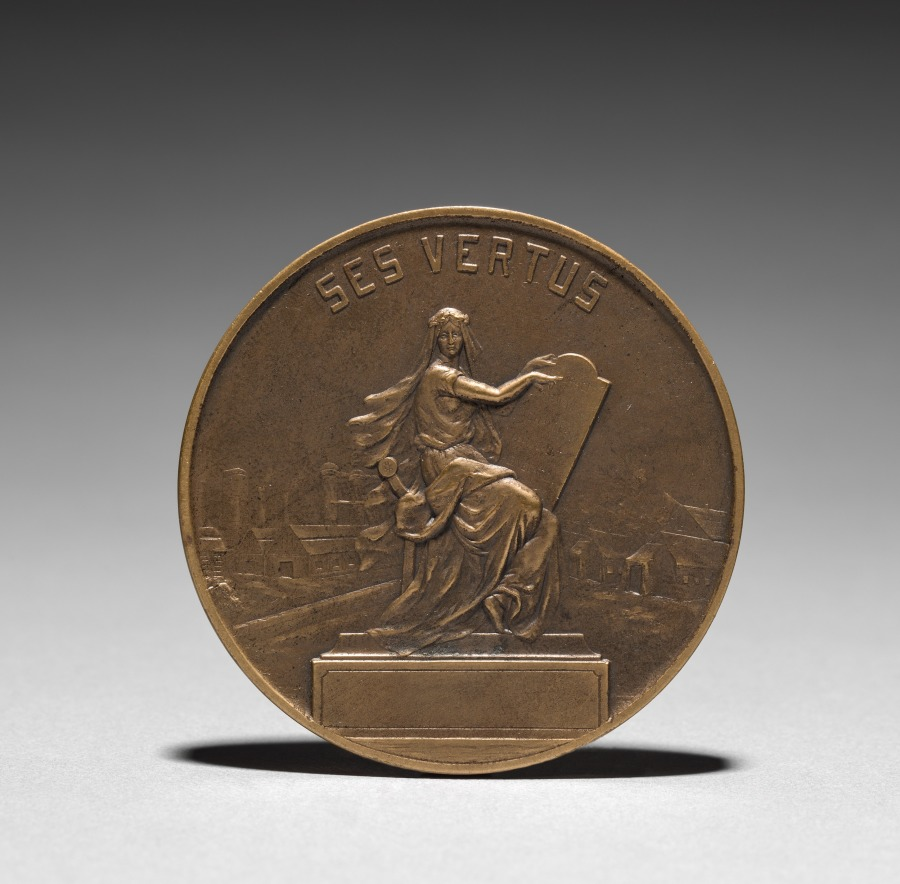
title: Medallion (reverse)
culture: France, 19th-20th century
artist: Henri Emile Allouard (French, 1844–1929)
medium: bronze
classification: Metalwork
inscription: "Ses vertus, courage, travail, charity, devouement, abnegation" (Her virtues, courage, work, charity, self-sacrifice, sef-denial); signed: "H. Allouard 1918."